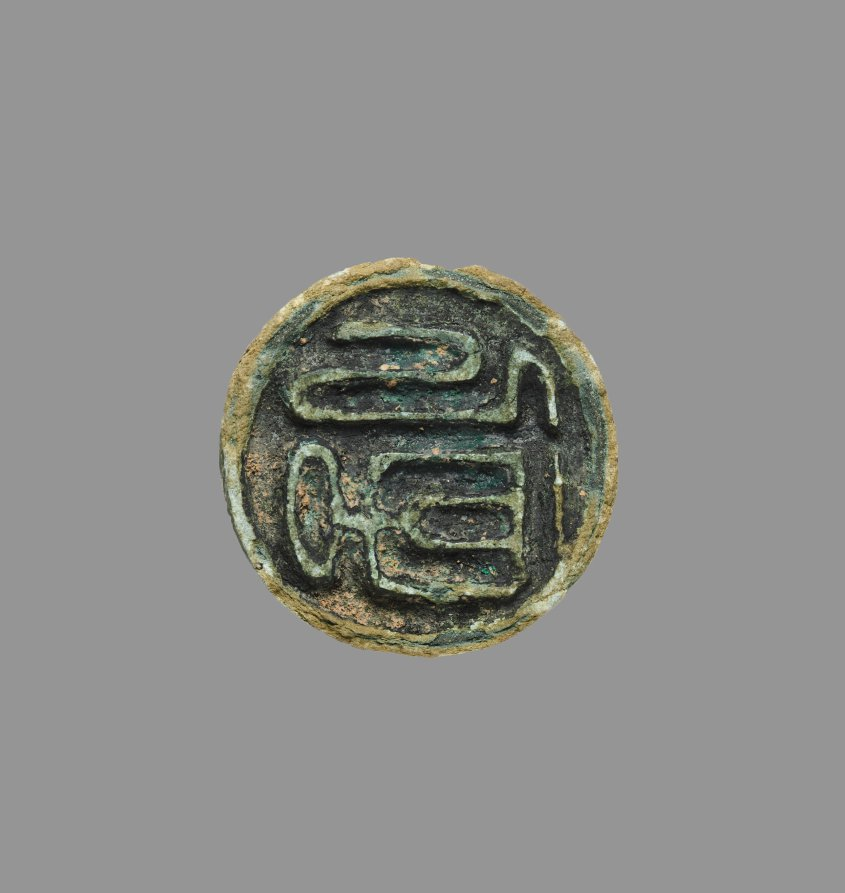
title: Seal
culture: Korea, Goryeo dynasty (918–1392)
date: 918–1392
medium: bronze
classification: Metalwork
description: A large quantity of bronze seals were excavated from tombs of the Goryeo dynasty. This bronze seal appears to have been designed for stamping the sealed envelopes of letters. However, the remains of red cinnabar seal paste is not very visible; it may not have been used much before it was buried in the tomb.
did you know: A large quantity of bronze seals excavated from tombs of the Goryeo dynasty is closely related to the development of metallurgy in 13th-century Korea that allowed the transition from wood type to movable metal type printing.